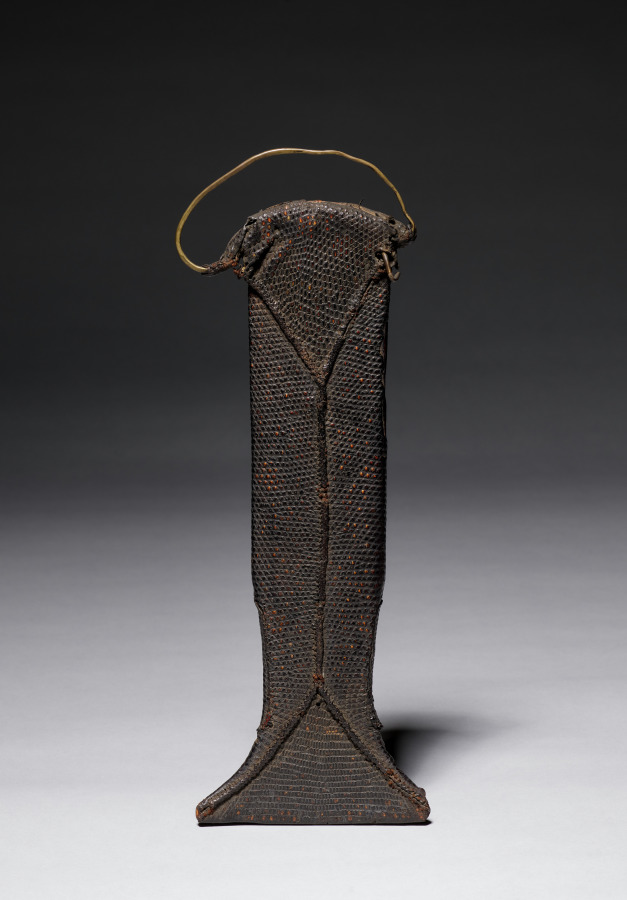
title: Sheath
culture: Africa, Central Africa, Democratic Republic of Congo, unknown maker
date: 1800s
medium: Reptile skin and copper alloy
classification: Arms and Armor